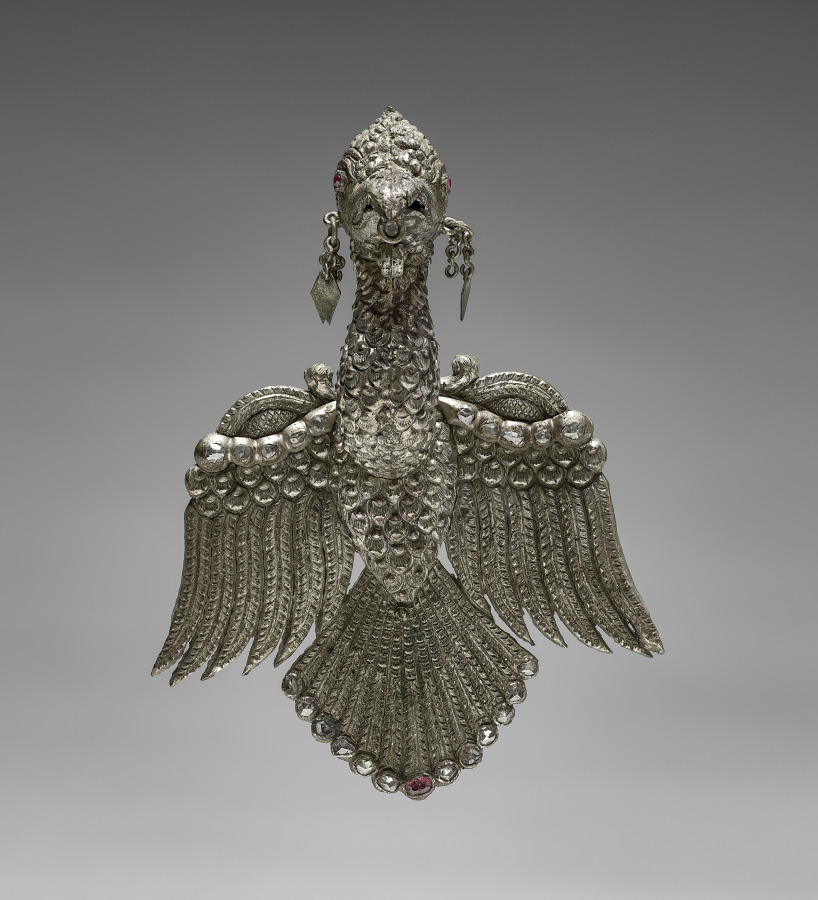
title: Hat Ornament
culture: Burma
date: 1800s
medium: silver and rubies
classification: Jewelry